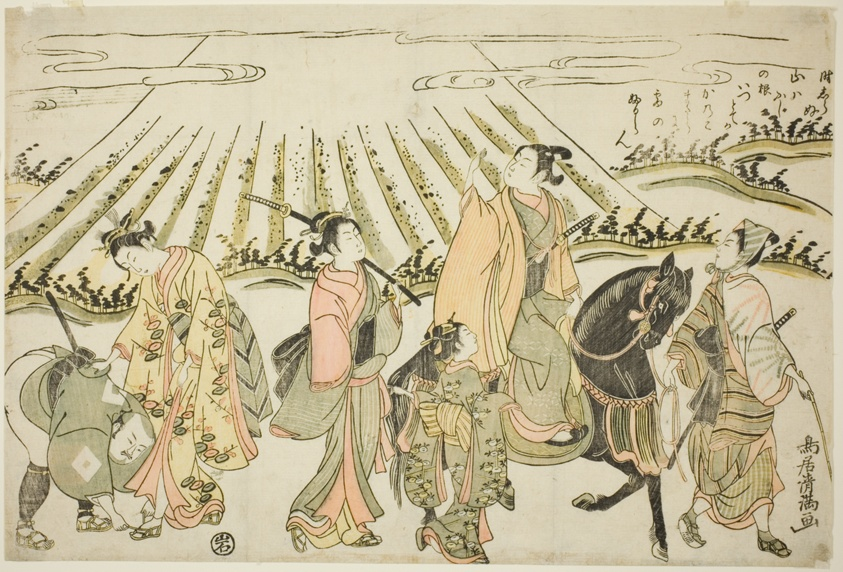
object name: Print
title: A parody of Narihira's eastern journey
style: Japanese (culture or style)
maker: Torii Kiyomitsu I (Japanese, 1735-1785)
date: c. 1764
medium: Color woodblock print; oban, benizuri-e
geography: Japan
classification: woodblock print; print; asian art